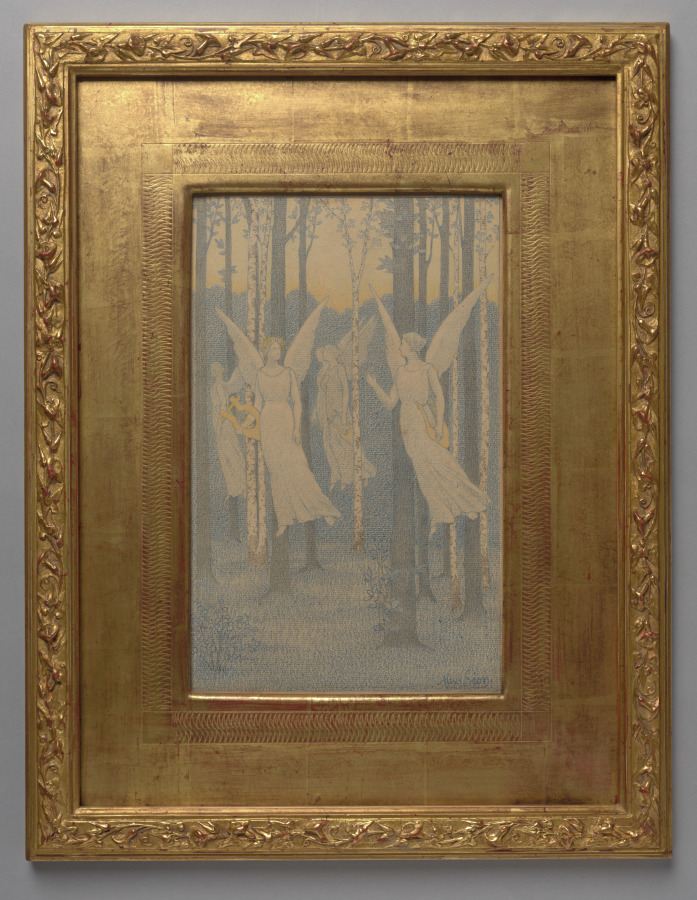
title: Study for “In the Woods, Evening”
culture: France, 19th century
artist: Alexandre Séon (French, 1855–1917)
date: 1892–94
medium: colored pencils on beige laid paper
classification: Drawing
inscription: inscribed, lower right, in blue pencil: Alex Séon; on verso, along top margin, in pencil: Alexandre SEON 1855–1917 / elève de Puvis de Chavannes ¬– la secheresse / de son dessin et sa stylization glacée, s’allient / à la tendresse de son couloris – / [4527]; on verso, on tape at right center, in pencil: 3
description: In this drawing of nymphs holding lyres, Alexandre Séon hoped to depict, in his words, “the spirit of the forest.” He was inspired by fairy-tales he heard as a child about the woods near the remote village where he grew up. By applying colored pencils to a roughly textured sheet of paper, Séon evoked the hazy tones of twilight and gave the sheet a dreamlike tenor.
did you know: This drawing relates to a painting that was exhibited to critical acclaim at the 1894 Société nationale des Beaux-Arts—an important avant-garde exhibition—but is lost today.